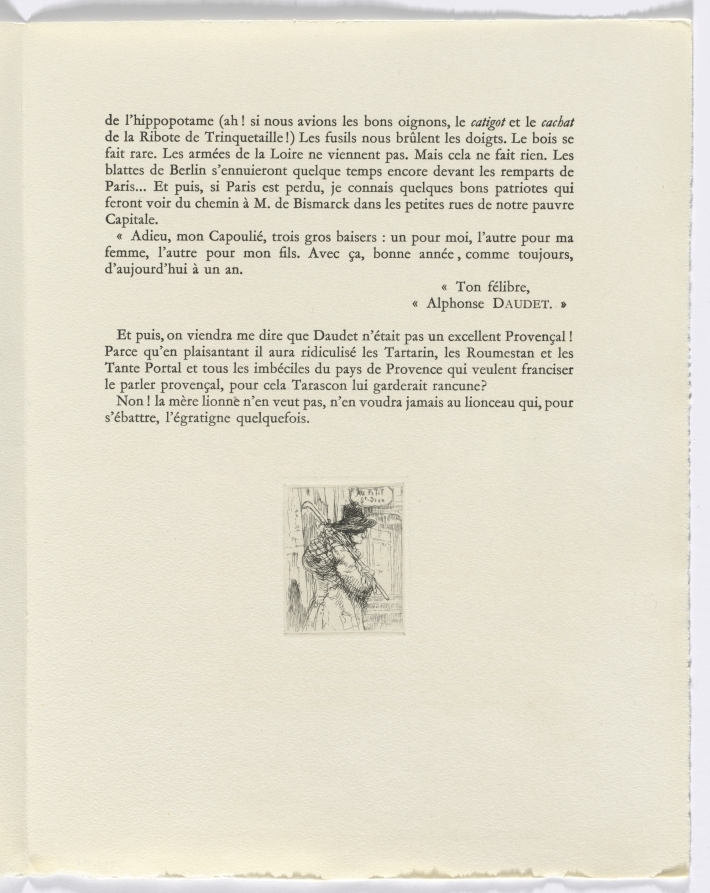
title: Frédéric Mistral: Mémoires et Recits by Frédéric Mistral: vagabond (page 223)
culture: France, 20th century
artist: Auguste Brouet (French, 1872–1941)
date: 1937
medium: etchings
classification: Portfolio